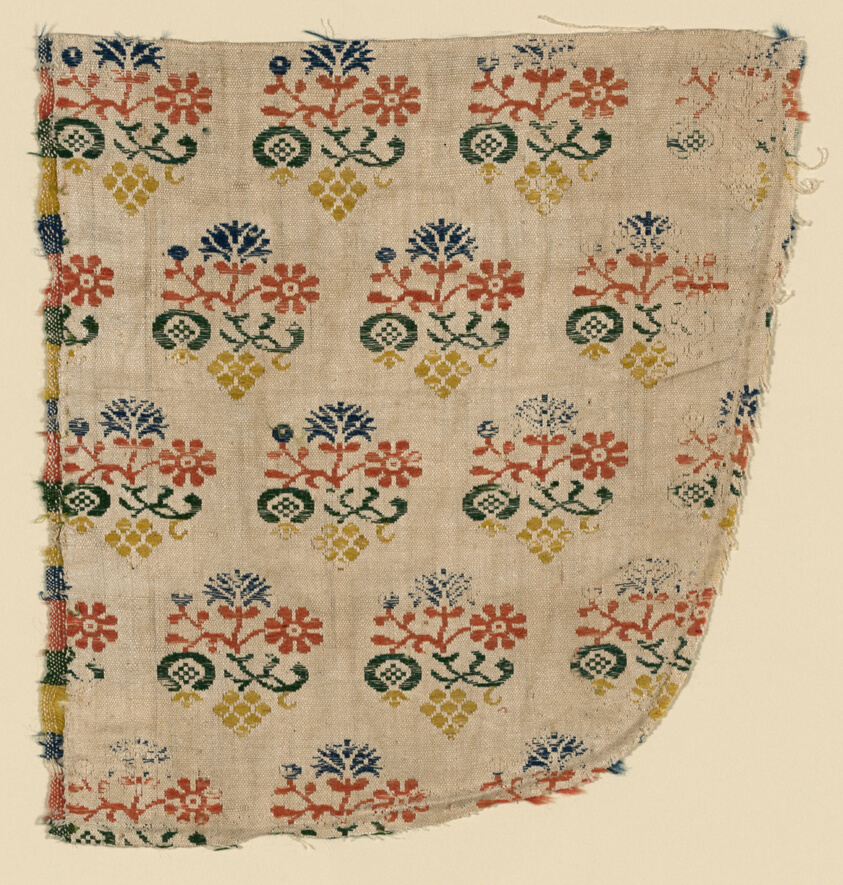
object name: Textile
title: Fragment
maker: Europe, possibly Italy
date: 1650/1700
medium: Linen and wool, compound weave (i.e. Beiderwand or Lampas 2:1)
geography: Europe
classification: textile; weaving